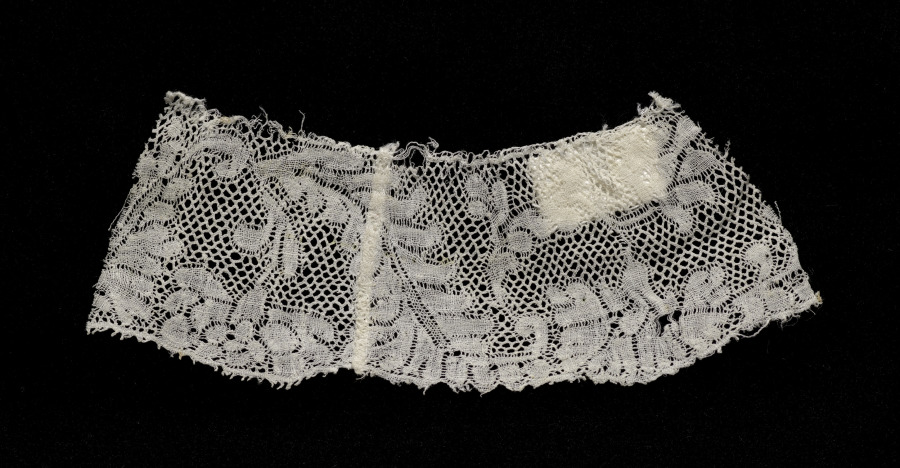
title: Lace Edging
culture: France, Valenciennes or Flanders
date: 1700s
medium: Linen: bobbin lace (Valenciennes)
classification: Lace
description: This lace fragment, with its design of floral motifs, is a duplicate of 1936.139.